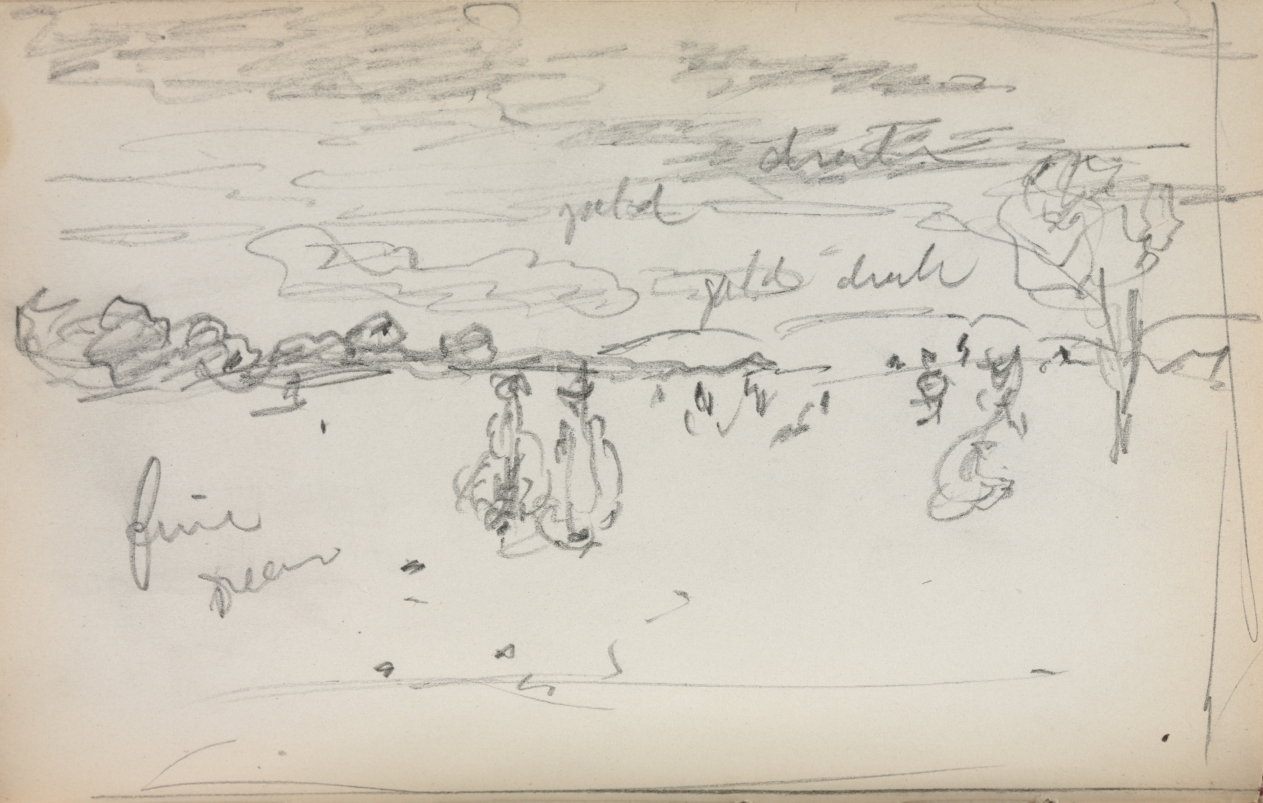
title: Italian Sketchbook: Landscape (page 57)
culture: America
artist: Maurice Prendergast (American, born Newfoundland [now Canada], 1858–1924)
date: 1898–1899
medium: pencil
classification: Bound Volume